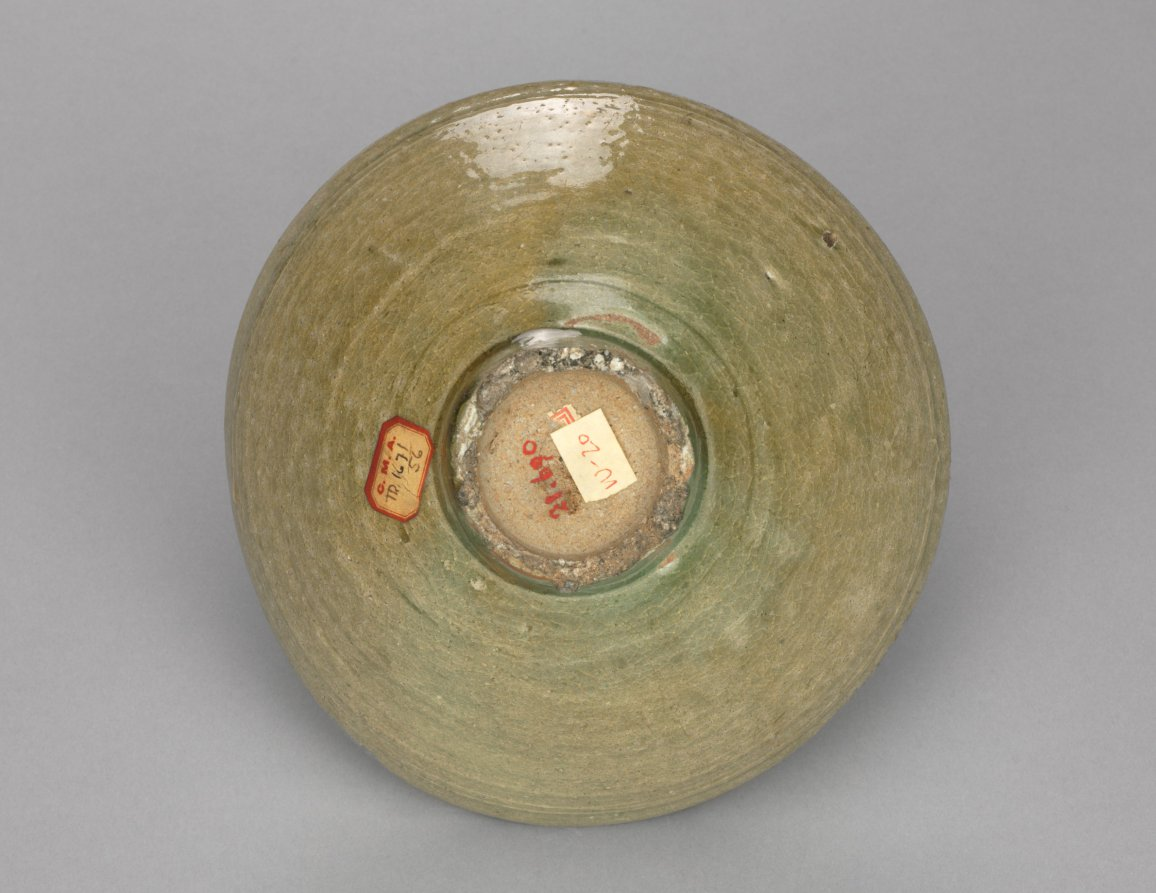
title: Bowl with Peony Design in Relief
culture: Korea, Goryeo dynasty (918–1392)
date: 1200s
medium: pottery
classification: Ceramic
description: As early as the 600s, the practice of drinking tea and wine became an important part of elite leisure culture in Korea. A wide bowl like this example was especially suitable for drinking powdered tea shaved from a compressed tea cake, the most commonly enjoyed type during the Goryeo period. A large bloomed peony in relief on the inside of this tea bowl may have made the moment of drinking tea more enjoyable.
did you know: Kangjin and Buan kilns in Jeolla province were the two major production centers for celadon wares during the Goryeo period (918-1392).